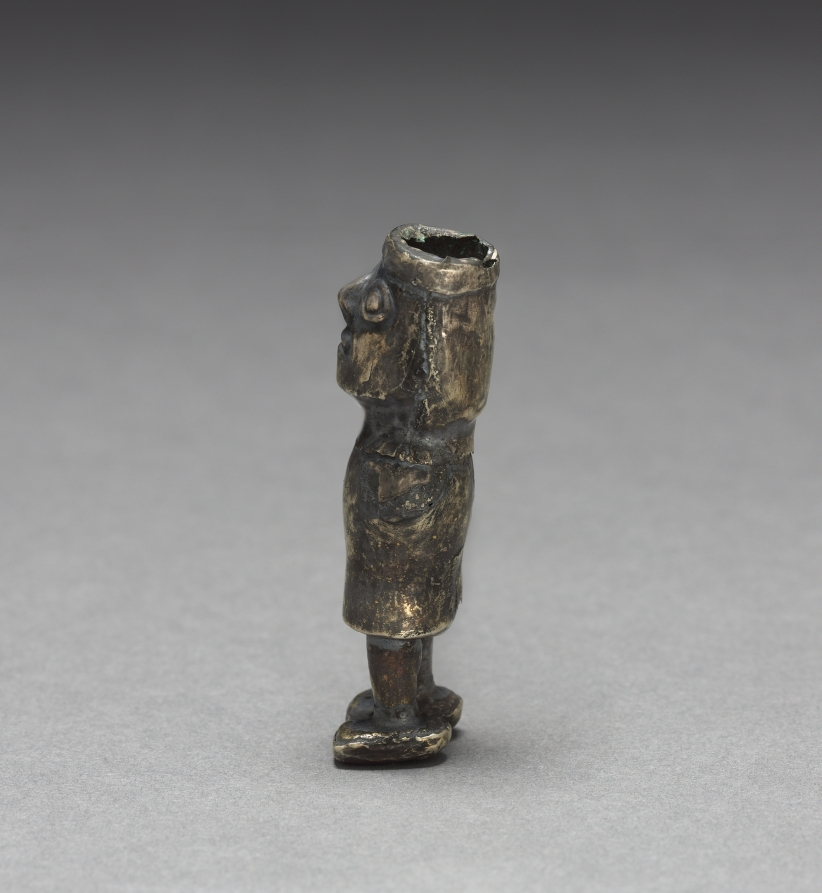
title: Figure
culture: Peru, Lambayeque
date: 1000–1532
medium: silver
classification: Metalwork